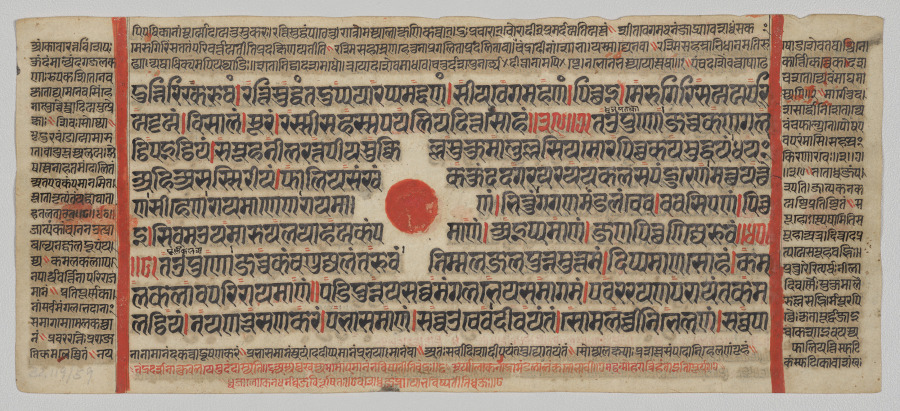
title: Text, Folio 17 (recto), from a Kalpa-sutra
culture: Western India, Gujarat, last quarter of the 15th century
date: c. 1475–1500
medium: Gum tempera, ink, and gold on paper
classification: Painting